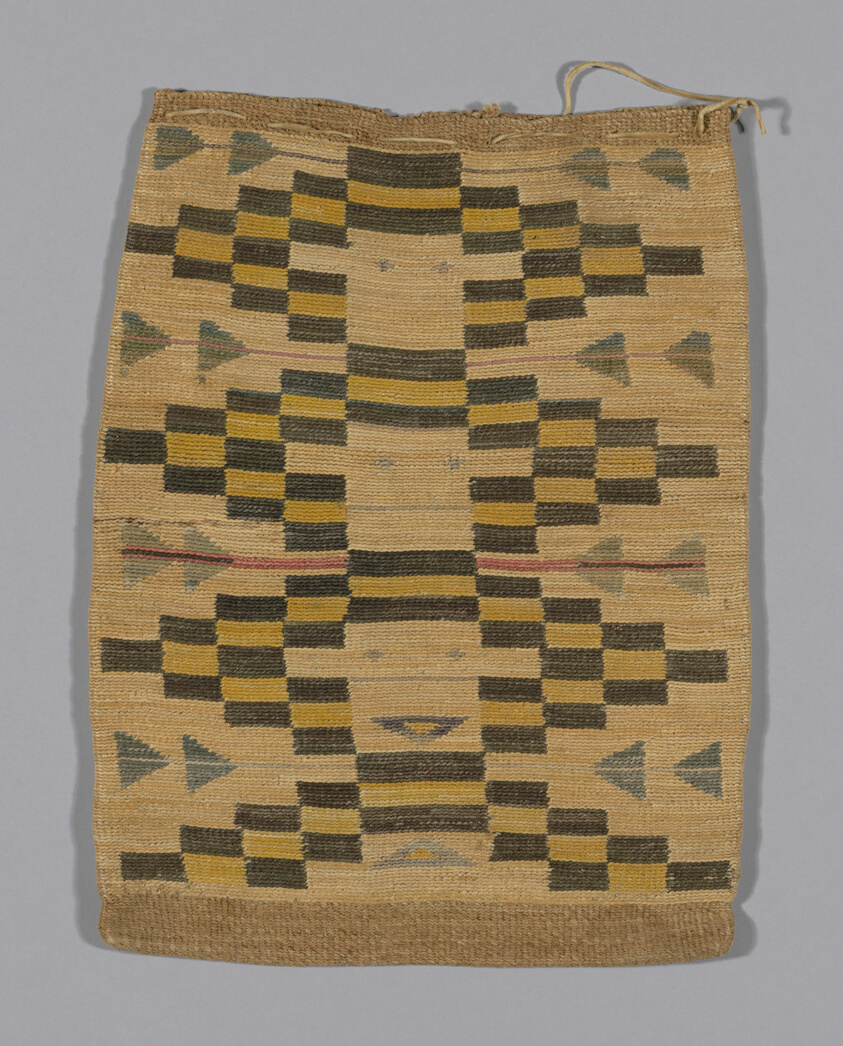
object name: Textile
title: ˀımáˀsp̉alx̣ (Flat Storage Bag)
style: native american, nez percé, nimiipuu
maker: Probably Nez Perce (Nimíipuu); Columbia Plateau, United States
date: c. 1860/80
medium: Bast fiber, two-strand weft-twining; with cornhusk supplementary weft-twining (false-embroidery); drawstring (possibly suede)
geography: Columbia Plateau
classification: textile; bag - weaving; needlework (visual works); weaving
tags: geometric